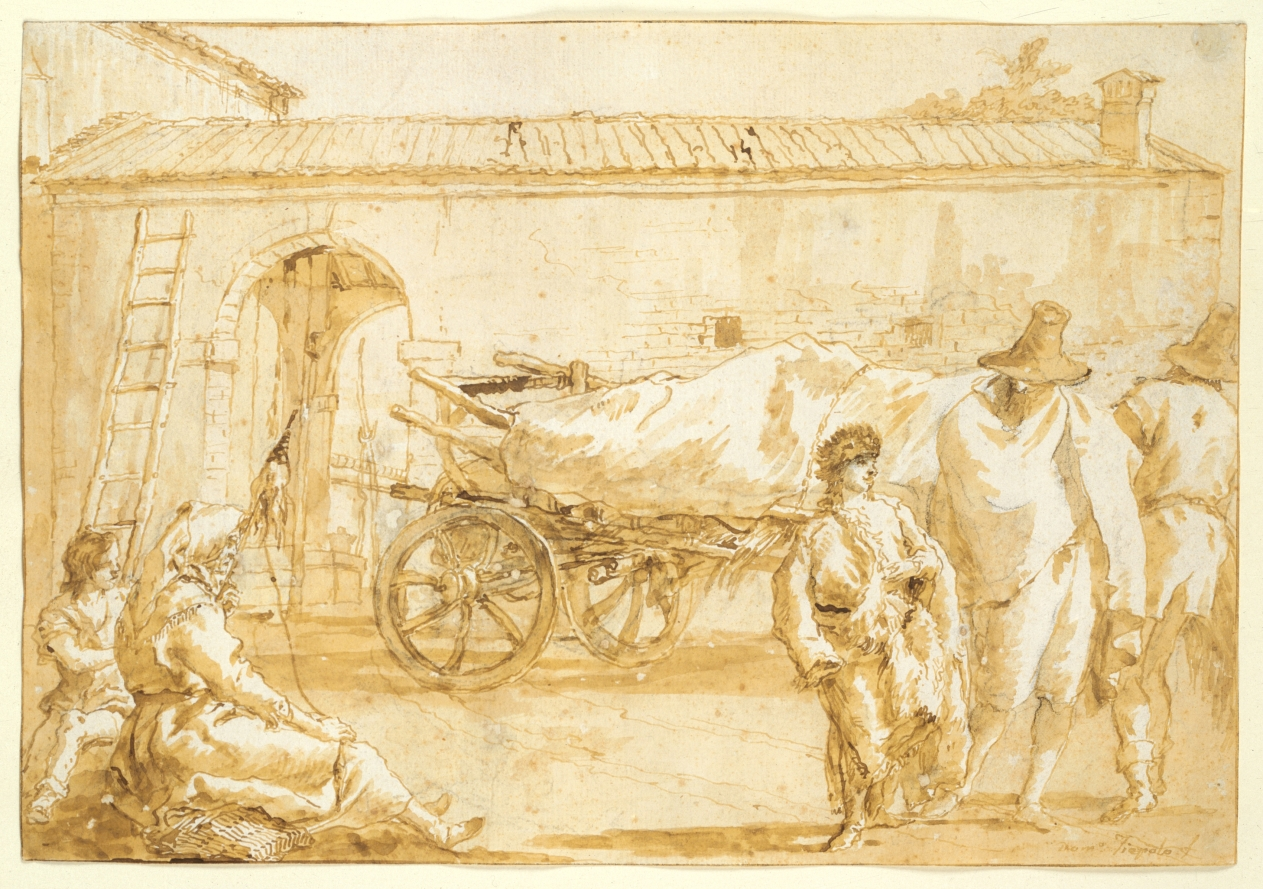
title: Peasants with a Farm-cart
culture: Italy, 18th century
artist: Giovanni Domenico Tiepolo (Italian, 1727–1804)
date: c. 1790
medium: pen and brown ink and brush and brown wash over black chalk; framing lines in brown ink over black chalk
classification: Drawing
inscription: signed, bottom right, in brown ink: Dom°. Tiepolo f ; VERSO, upper left, in black chalk: [S?] ; center, in graphite: 18 . [underlined] ; center, in black chalk: 18 [upside down] ; lower left, in brown ink: 4